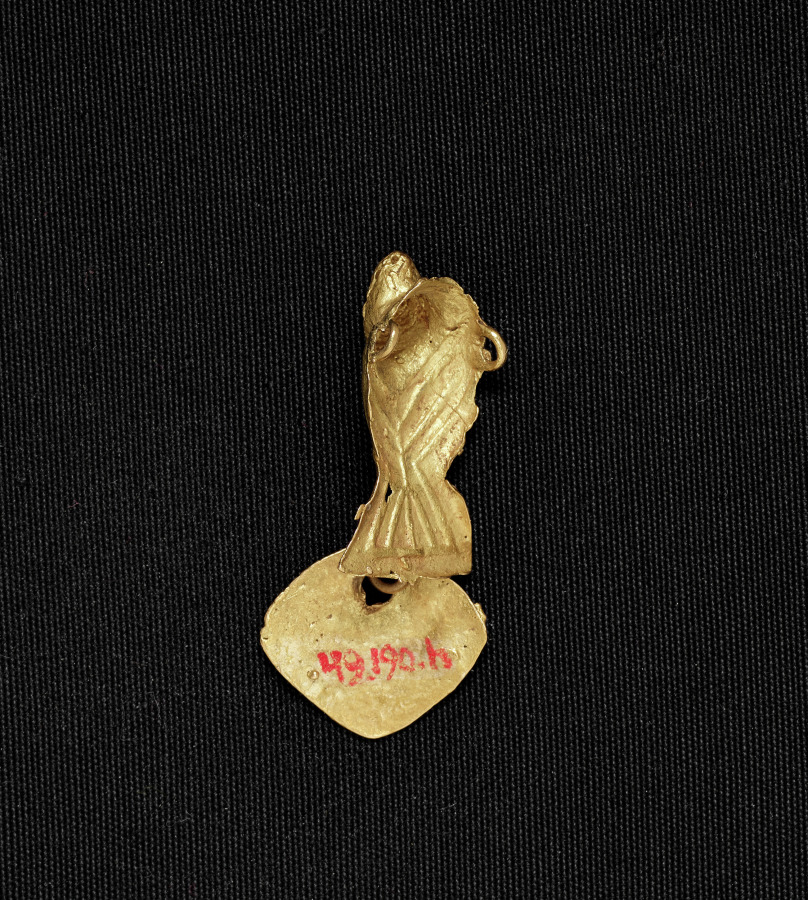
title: Bird Bead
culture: Colombia, Muisca style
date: c. 900–1550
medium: cast gold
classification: Jewelry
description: Muisca metalwork divides into two categories: ornaments to be worn, such as these, and offering figurines, in the case to the right. The elaborate bird pendant features delicate herringbone moldings, openwork patterns, and wing details-all part of the wax model from which the pendant was cast (see nearby computer animation). The dangles were attached after casting.